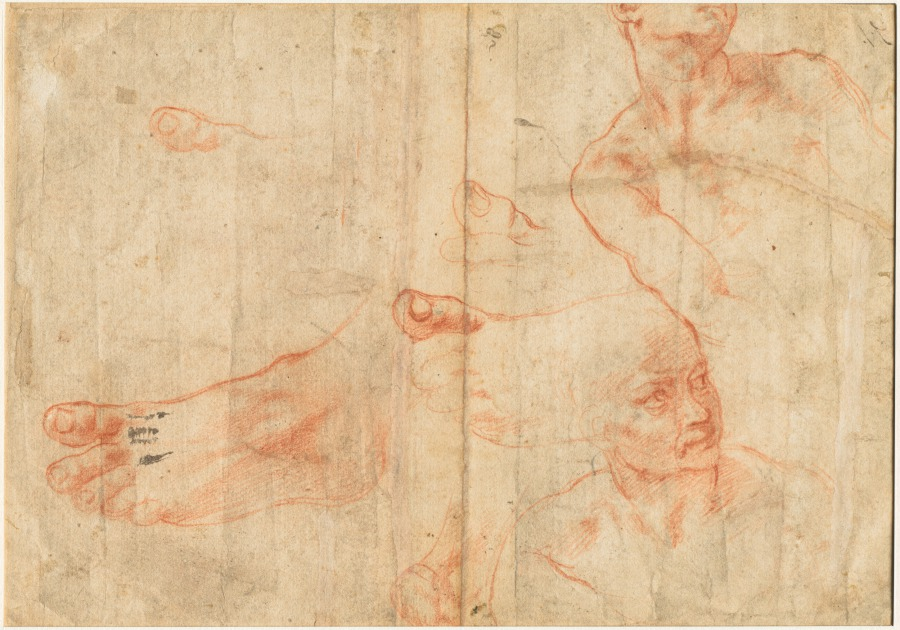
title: Figure Studies for the Sistine Ceiling (verso)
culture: Italy, 16th century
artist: Michelangelo Buonarroti (Italian, 1475–1564)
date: 1510–11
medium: red chalk heightened with traces of white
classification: Drawing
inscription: upper center, in brown ink: 82 (?); upper right, in brown ink: V./.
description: Universally considered one of the greatest artists of the Italian Renaissance, Michelangelo devoted four years to painting the vast ceiling fresco in the Sistine Chapel. This preparatory study portrays one of the 20 athletic male nudes, known as ignudi, who serve as supporting figures at each corner of the Old Testament scenes painted down the center of the ceiling. Michelangelo worked out the positioning of the ignudi in red chalk drawings before beginning to paint each section of wet plaster. The energy and monumentality of the figure in red chalk, whose body extends beyond the sheet, suggests the heroic athleticism of Michelangelo’s sculpture.